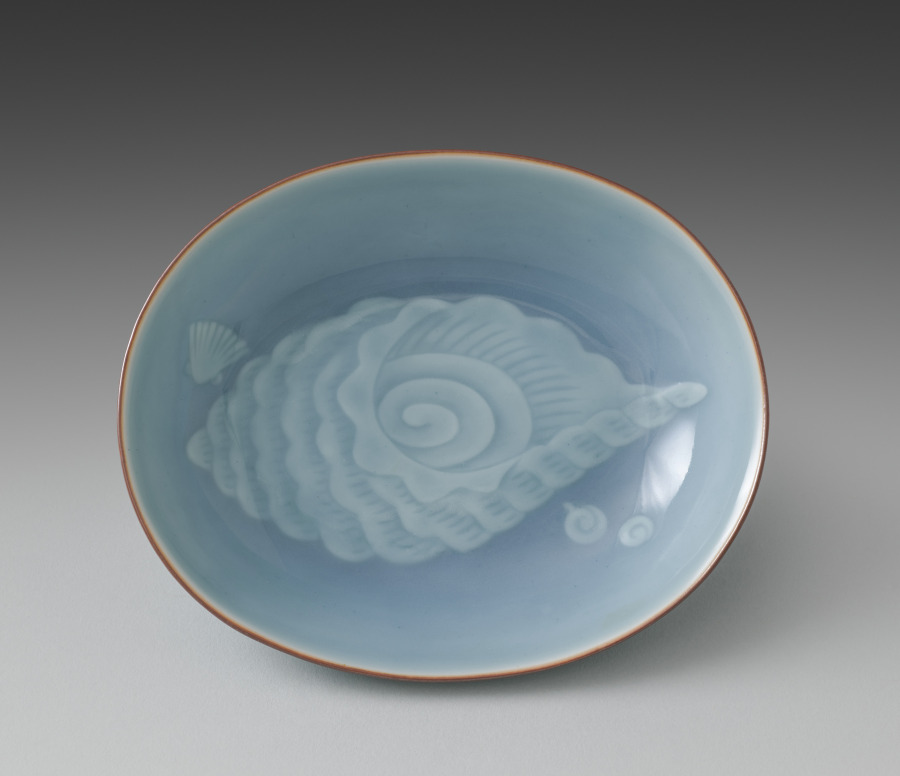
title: Dish from Dishes with Shells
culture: Japan, Taishō period (1912–26)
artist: Seifū Yohei IV (Japanese, 1872–1951)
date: 1914–46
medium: One from a set of five dishes; porcelain with blue glaze, iron oxide, and molded design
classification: Ceramic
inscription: 清風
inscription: 清風造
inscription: 清風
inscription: 成山清風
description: Yohei IV chose an aquatic theme for this set of five mukōzuke, side dishes. He added an iron oxide rim and used a concentrated blue glaze on both the interior and exterior. The glaze, named on the box lid, is his father’s “evening moon” (tsukiyoi) color. The conch in relief takes up the entire bottom of the dish. Up the sides are two snails on one end and on the other a scallop. This results in a boldly graphic, less realistic effect.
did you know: This set of dishes, mukōzuke, could be used for serving small side dishes at a tea gathering.